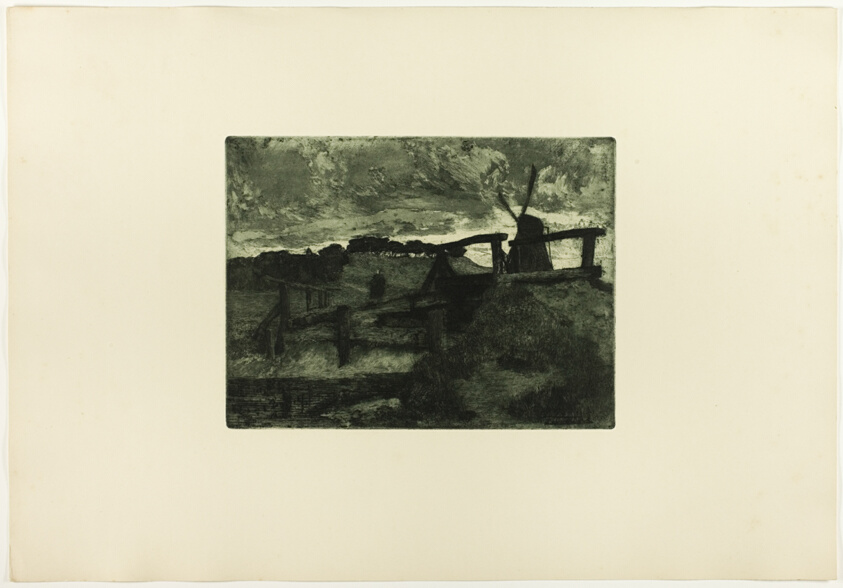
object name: Print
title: Windmill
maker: Fritz Overbeck (German, 1869-1909)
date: 1895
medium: Etching with dark green ink on cream wove paper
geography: Germany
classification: etching; prints and drawing; print; portfolio